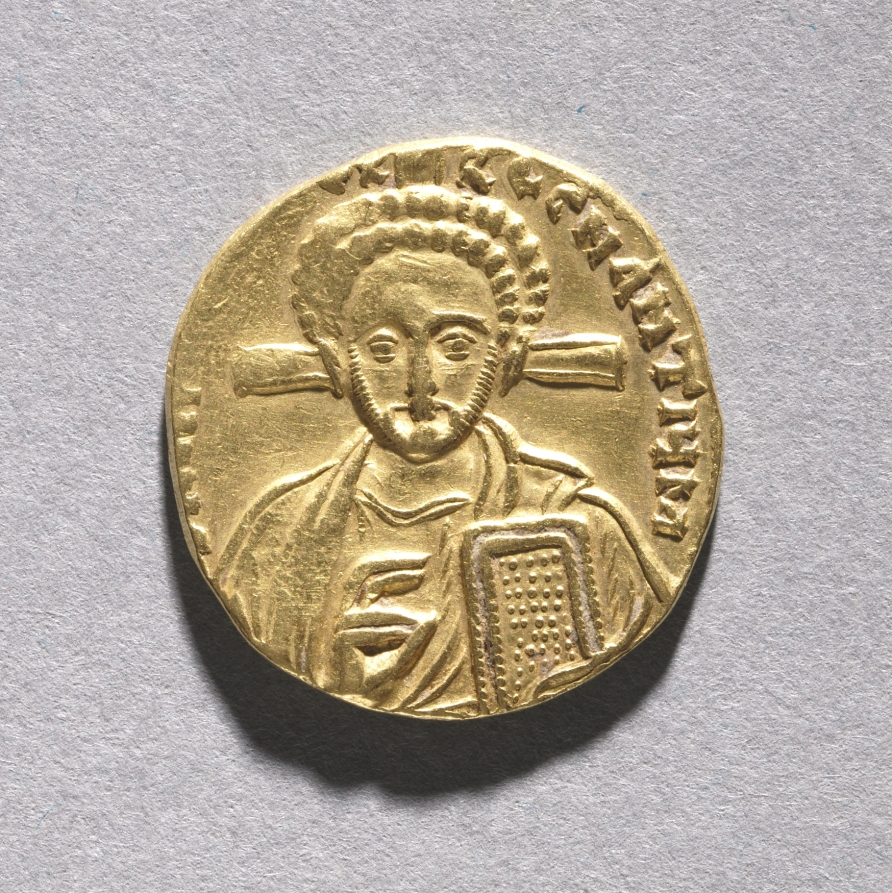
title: Solidus with Justinian II Rhinometus and His Son Tiberius (obverse)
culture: Byzantium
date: 705–711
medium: gold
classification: Coins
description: The vast number of surviving Byzantine coins attests to the level of trade across the empire. Controlled and supervised by the emperor, the producers of coins took care to represent his authority and reflect his stature. Talented artists were recruited to engrave the dies (molds) used for the striking of coins. Emperors increasingly came to include their heirs and co-emperors on their coinage, as well as other family members or even earlier rulers. Coins were recognized, then as now, as small, portable works of art. With their inscriptions and images, Byzantine coins provide valuable documentation of historical events and a record of the physical appearance of the emperors. The coins shown here include the solidus, the basic gold coin of 24 karats; the tremissis, a gold coin of one-third the weight and value of the solidus; and the nomisma, which in the 10th century replaced the solidus as the standard gold coin.